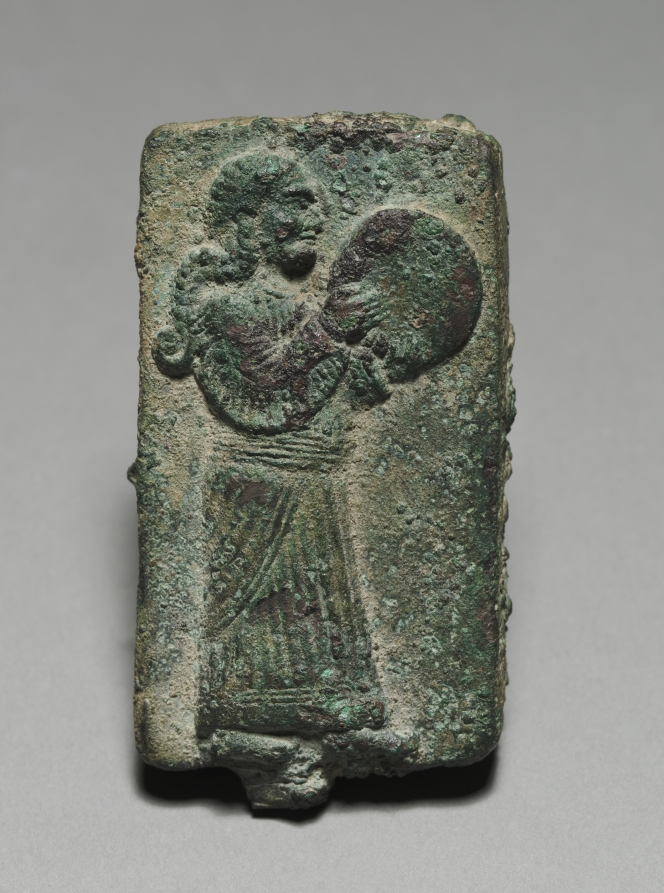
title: Hand Drummer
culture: Assyrian, Iraq or possibly Syria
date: 900–700 BCE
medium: bronze, solid cast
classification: Metalwork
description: This plaque is probably one of several that decorated the side of a throne. The man's hair and costume are similar to those on the huge wall relief, and they are probably about the same date.